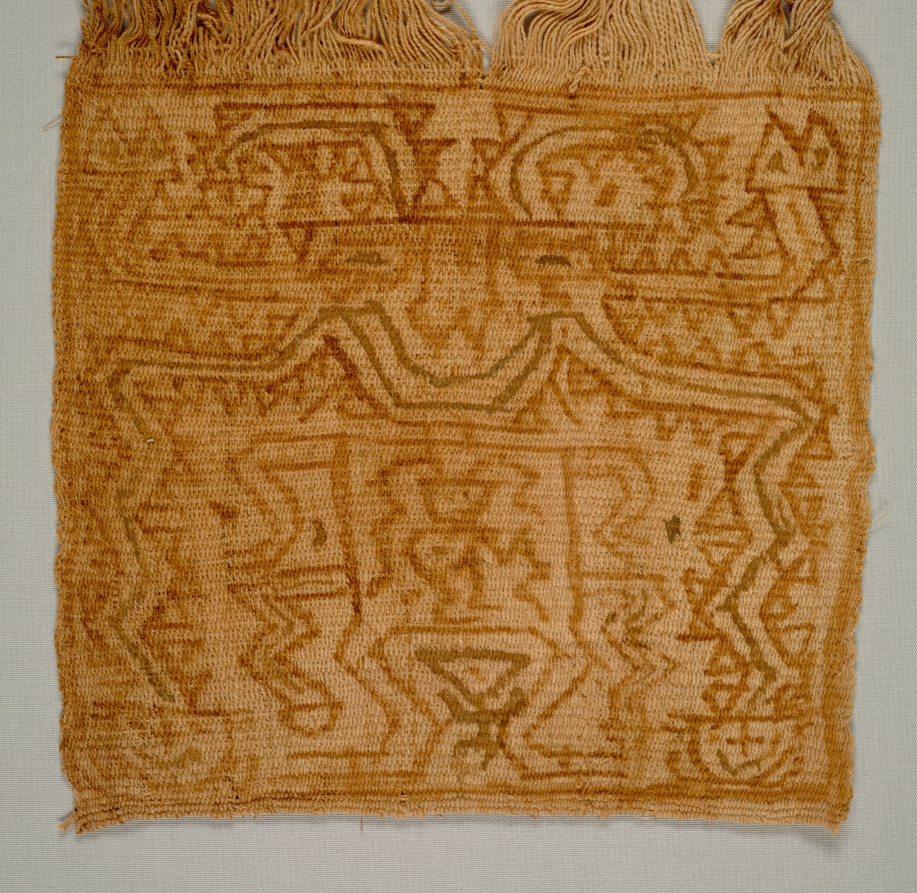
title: Mummy Bundle "Mask"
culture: Peru, South Coast, Ica Valley, Ocucaje site, Paracas style (700 BCE–1 CE)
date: 400–200 BCE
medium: Cotton and pigment; plain weave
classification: Textile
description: The Paracas people buried their dead in bundles that they created by carefully wrapping the seated human body in layers of garments and other textiles. In some cases, they placed a painted cloth—such as these examples—on the outer layer and at the top of the bundle. The hair-like yarns (unwoven warps) were arranged around a solid cotton disk that was sometimes wrapped with a headband. The cloths, then, seem to have functioned as the bundle’s head, even though some are painted not with faces but with complete figures whose supernatural character is marked by the appendages streaming from their bodies.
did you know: These masks fall into two categories, those with only a face and those with a full-bodied figure.